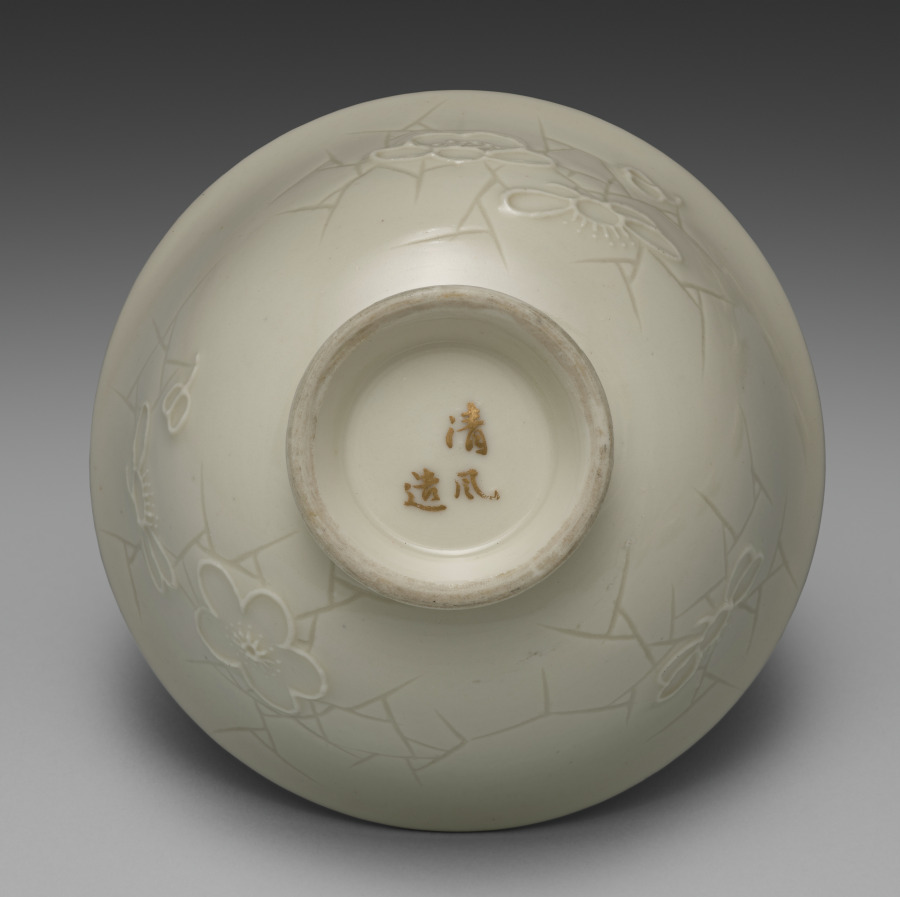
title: Bowl from Dining Set with Plum Blossoms and Cracked-Ice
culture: Japan, Meiji period (1868–1912)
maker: Seifū Yohei II (Japanese, 1844–1878)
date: c. 1875–78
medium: Porcelain with molded designs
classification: Ceramic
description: Each item in this set has a delicate low-relief design of flowering plum branches over scattered, intersecting lines meant to resemble the cracked-ice surface of a frozen body of water and is signed on the base in gold pigment. While Yohei II produced many fine works in underglaze blue, like those produced by Kiyomizu Shichibei, he also made works in quite different styles later in his career, from the early 1870 s. In 1873, he was appointed purveyor to the Industrial Center of Kyoto Prefecture, a designation associated with Kyoto’s efforts to reach an international market through the port of Kobe; and from 1875 until his death, he was involved in national-level projects to present Japanese ceramics across the world. It was during this period that Yohei III was apprenticed to Yohei II, and it has been suggested that this set may in fact be an early example of Yohei III’s work, which he signed with his teacher’s name. Decorated with flowers resembling Japanese textile motifs, the set calls to mind the design of Yohei II’s pair of vases with plum blossoms in the Victoria and Albert Museum. Here, the elaborate trees created for a formal public exhibition setting have been translated into the approachable blossoms of the genteel domestic environment. While the designs are consistent across the pieces, each raised flower petal and pistil and each incised line in the ice was done by hand, so the cups, bowls, and dishes are similar yet unique. The bottoms of two boxes once identified the set’s owner, but the information has been deliberately obscured with black ink. However, inscriptions still visible appear to indicate two occasions, once at the end of July 1886 , and once again in June 1916 , when parts of the set were requested from Hokura in Niigata Prefecture. The location corresponds to a neighborhood in the present-day city of Jōetsu. The surname Tsuji 辻 also appears on a paper tag affixed to one of the box cloths. Future research may possibly reveal more about their provenance. A vase by Yohei III in a private collection combines the formal grandeur of the Yohei II vases in the Victoria and Albert Museum with the gentler design of this dining set, placing flowering plum trees against soft, scalloped-edge clouds resembling those in golden screens.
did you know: The dining wares have a creamy white coloration that the four boxes containing them identify as Korean in style.